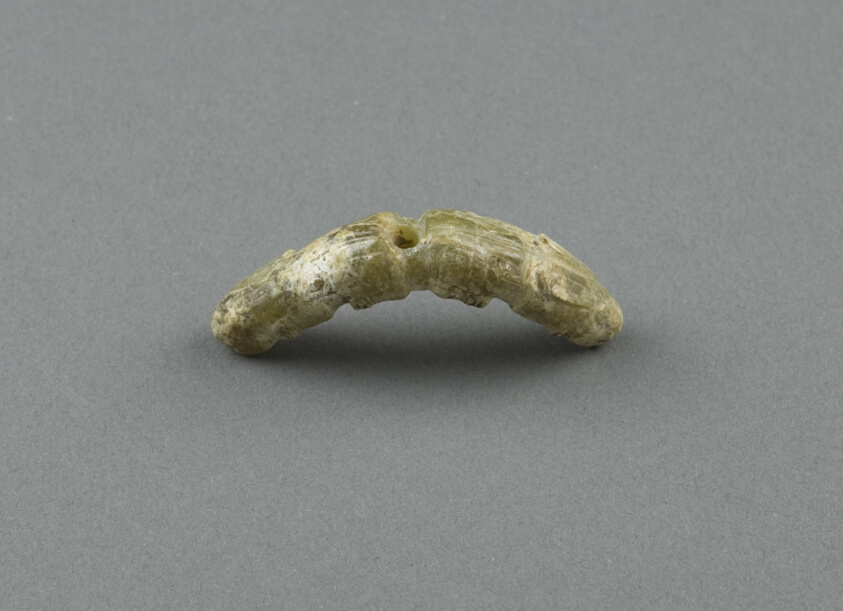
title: Pendant, curved with two rabbits.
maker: China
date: Shang dynasty (c.1600–1050 BC)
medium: Jade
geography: China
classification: jade; asian art